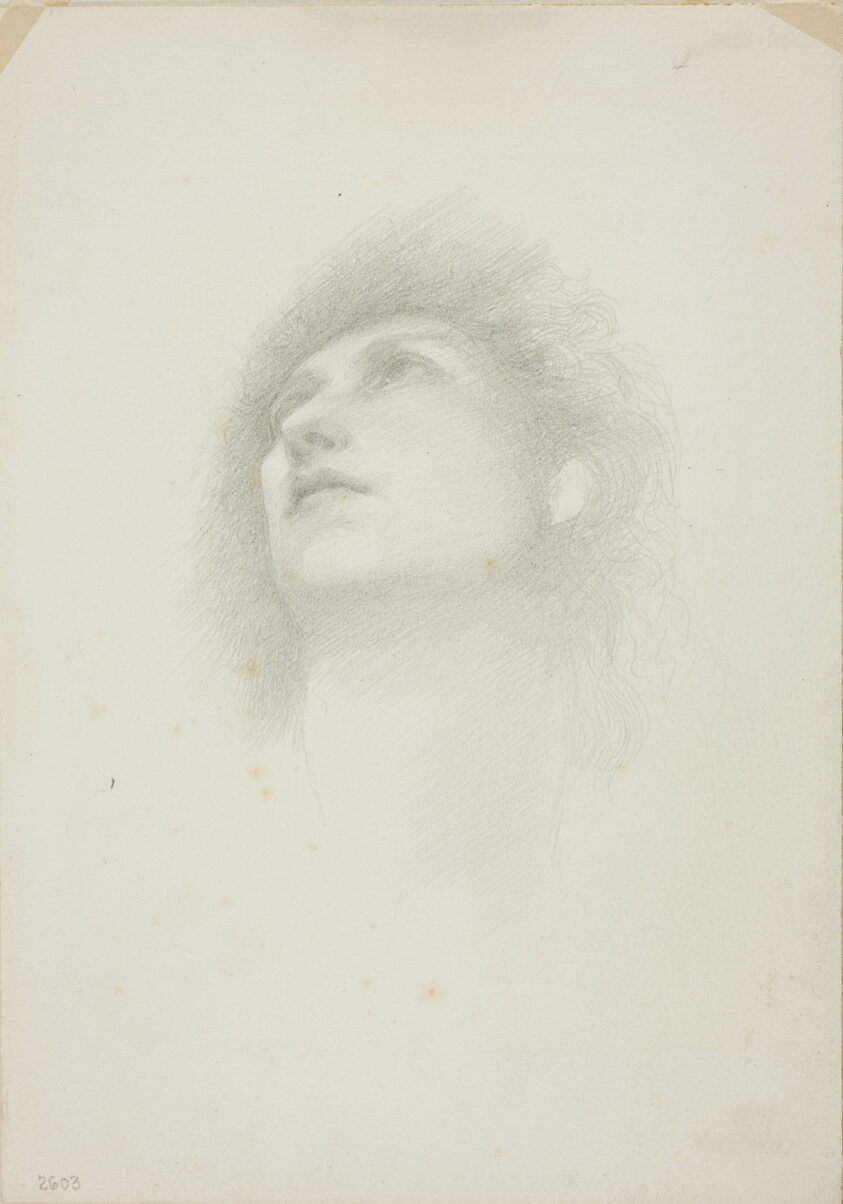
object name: Drawing and Watercolor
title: Head of a Woman with Face Upturned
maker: Sir Edward Burne-Jones (English, 1833-1898)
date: c. 1873–77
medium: Graphite on ivory wove paper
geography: England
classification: graphite; drawings (visual works); prints and drawing